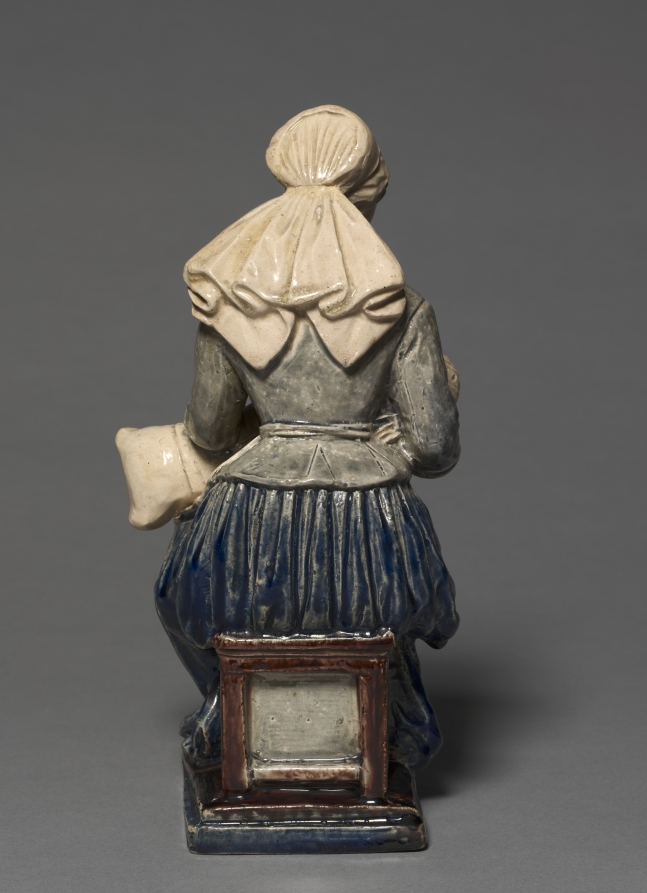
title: Figure of the Nurse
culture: France, 17th century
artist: attributed to Claude Bertélémy de Blénod (French)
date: early 1600s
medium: faience with enamel decoration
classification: Ceramic